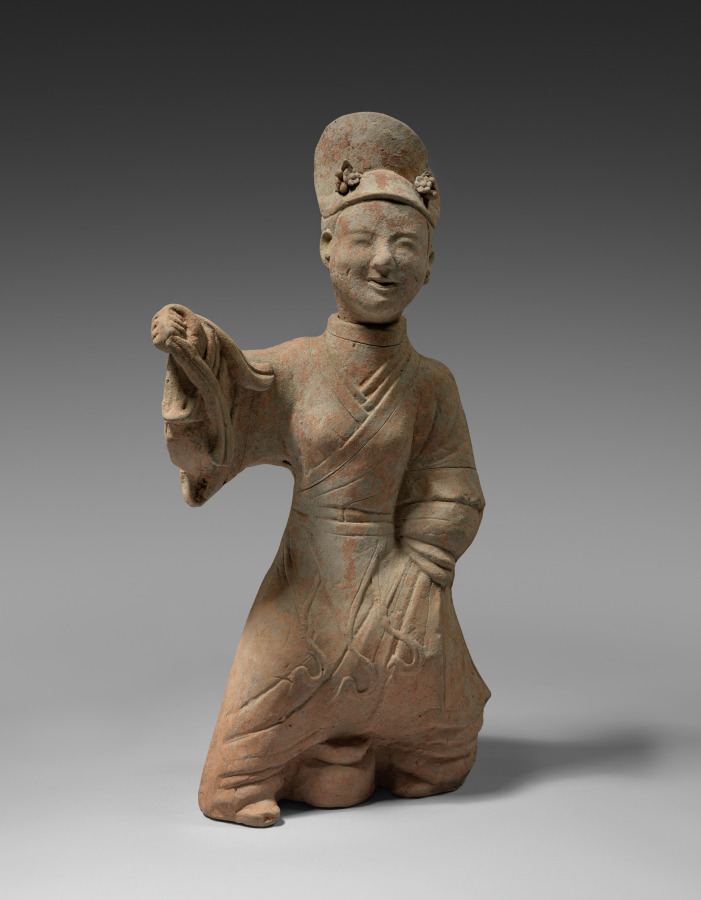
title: Female Figure of a Court Entertainer Dancing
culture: China, Sichuan province, Eastern Han dynasty (25–220 CE)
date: 100s CE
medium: Pottery with traces of color pigment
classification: Ceramic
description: During the Han era, tombs of the elite were provided with sculpted renditions of their earthly entourage, such as guardians or musicians, to signify their status in the afterlife. The female dancer with elaborate hairdo held by flower ornaments raises one arm holding her wide sleeve with one hand, while the other lifts her robe to reveal what appears to be a drum underneath her garment, her face smiling, all in a gesture of an entertainer.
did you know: The dancer lifts her robe to reveal what appears to be a drum underneath her garment.